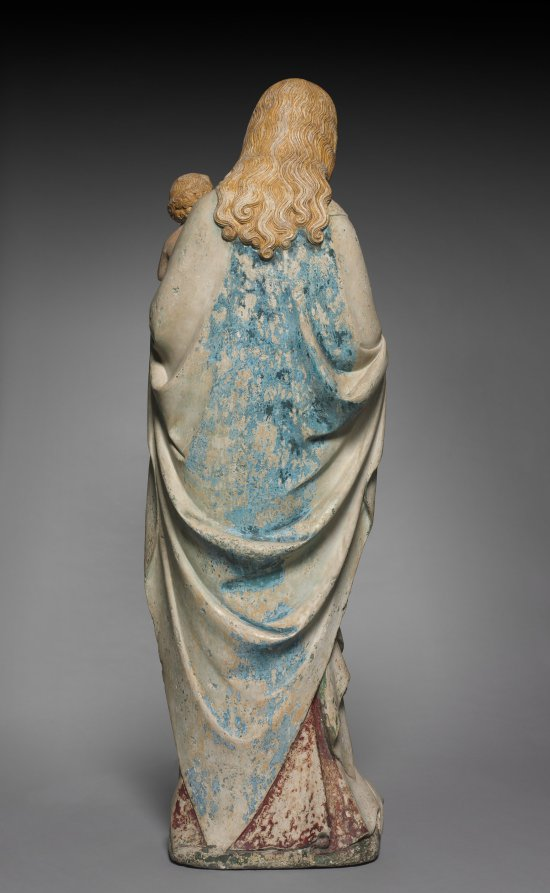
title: Virgin and Child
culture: France, Loire Valley, 14th century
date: c. 1385–90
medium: limestone with traces of polychromy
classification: Sculpture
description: The vibrant naturalism of the Virgin’s face and long flowing hair, as well as the deep, rich folds of drapery are characteristic of the work of itinerant artists from the Netherlands who found employment at the Valois courts of France at Paris, Berry, and Burgundy. Their native styles and attention to realistic detail fused with native French artistic traditions toward the end of the 14th century and took root. The original source of this Virgin and Child is unknown, but its style suggests a relationship with similar sculptures made for churches and abbeys of the Central Loire Valley. The additional influence of the style of the sculptor André Beauneveu has also been noted for this sculpture. His commissions were abundant and his influence widespread. The sculptor of this work appears to have had some knowledge of Beauneveu’s work in the Loire region.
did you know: This sculpture was painted over many times over its history, common for medieval sculpture.